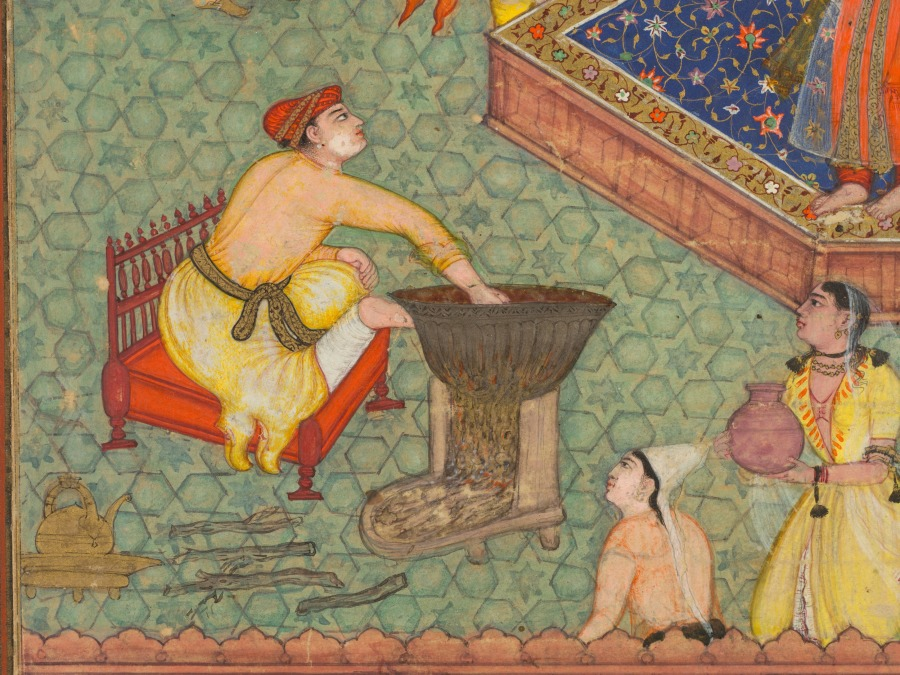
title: A Man Dips His Hand into a Cauldron as Ladies of the Harem Stand in Amazement: A Page from a Manuscript of Religious History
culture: Mughal India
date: c. 1600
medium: Gum tempera and gold on paper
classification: Painting